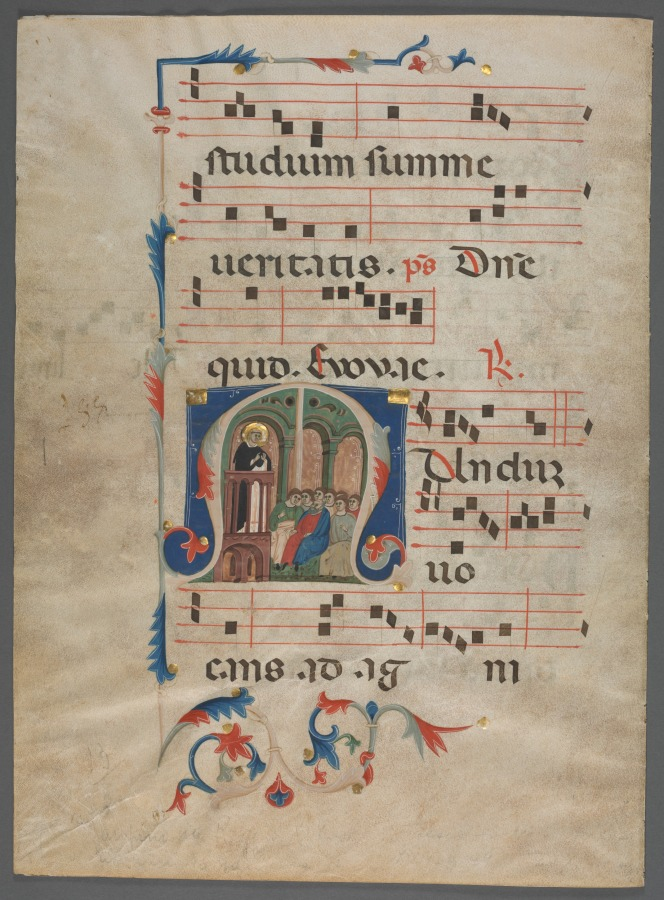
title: Bifolium from an Antiphonary: Initial M with Saint Dominic Preaching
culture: Italy, Bologna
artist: Primo Miniatore di San Domenico (Italian)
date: c. 1320–40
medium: ink, tempera, and gold on parchment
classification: Manuscript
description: The representation of Saint Dominic (1170–1221), founder of the Dominican Order of Preachers, in this initial suggests that this double page was at one time part of a manuscript made for a Dominican convent. Saint Dominic traveled much, preaching throughout Europe, and was particularly venerated in Bologna, the city in which he died and was buried. The illuminator of this initial is named after a volume he decorated of Seneca’s works (now in the Bibliothèque nationale in Paris). His workshop specialized in large-scale manuscripts destined for wealthy religious institutions in the region of Emilia, for which Bologna was the artistic and intellectual center.